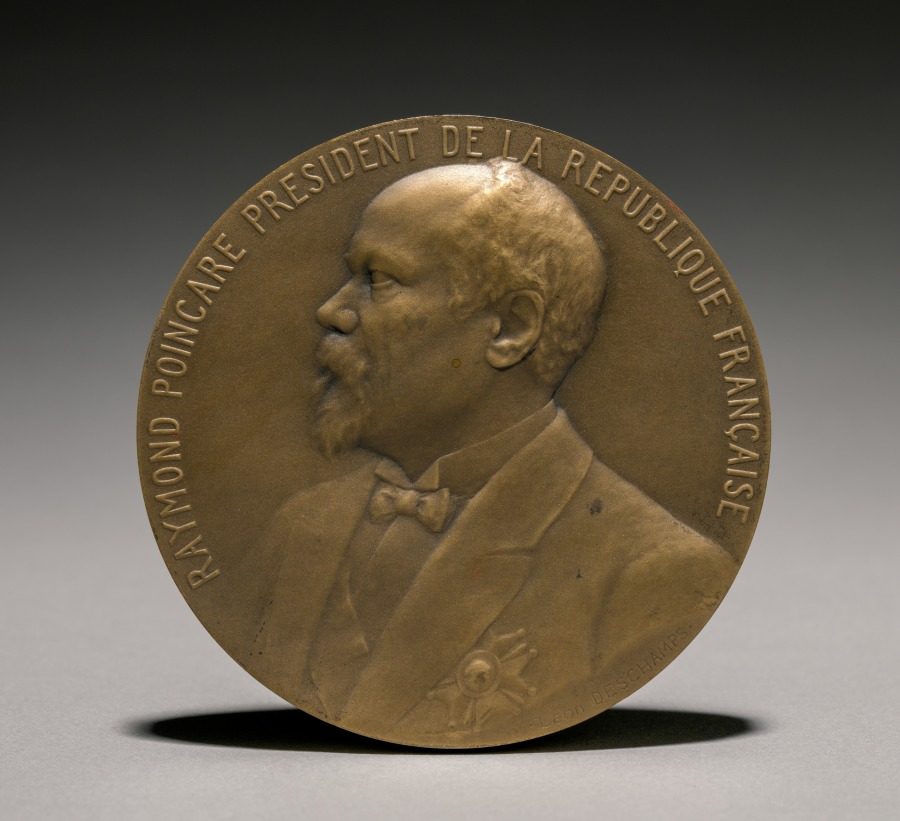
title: Poincarè Medal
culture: France, 20th century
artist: Léon Julien Deschamps (French, 1860–1928)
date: 1900s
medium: bronze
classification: Metalwork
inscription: obverse - "Raymond Poincarè President de la Republique Francaise." reverse - woman holding book on which is inscribed: "Poincarè President de la Republique Francaise"; above: "Elu par l'assemblee nationale le XVII Janvier MCMXIII."